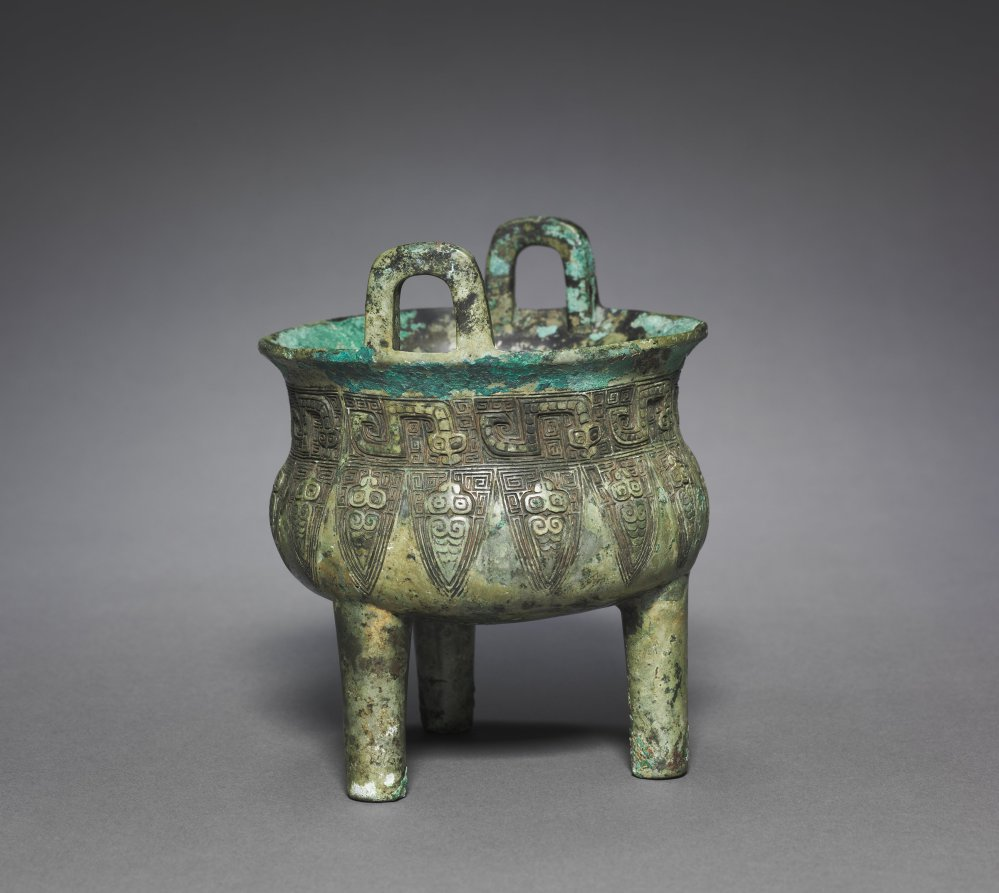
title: Tripod Cauldron (Ding)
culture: China, Shang dynasty (c. 1600–c. 1046 BCE)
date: 1200–1100 BCE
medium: bronze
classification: Metalwork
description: In ancient China, bronze tripods of the type called ding were made in sets of different sizes to be used in rituals in which grain and meat was offered to the spirits of the ancestors. These bronzes were subsequently both collected items and major scholarly preoccupations in Chinese history. They were prized art treasures that provide source materials for Chinese historiography and antiquity studies. Catalogues of archaic bronzes have been published since the Song dynasty. Scholars studied the bronze inscriptions, typologies, and terminologies, and these studies exerted an impact in the field well before the birth of modern art history and archaeology.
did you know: The vessel shows a band of silkworms and cicadas in two registers.